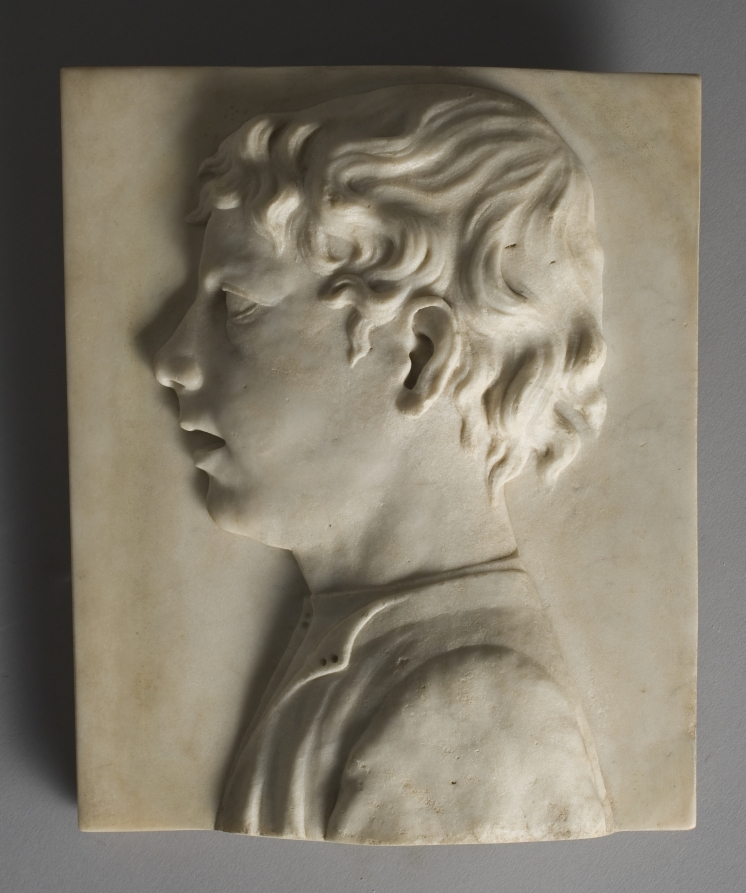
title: Head of a Boy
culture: Italy, Florence, 15th century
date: c. 1460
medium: marble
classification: Sculpture